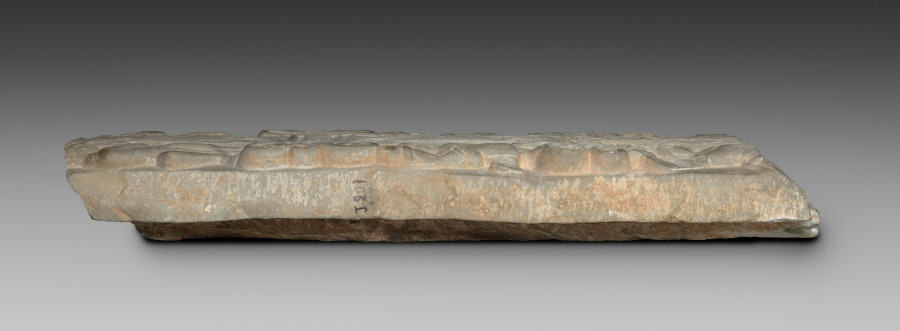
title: Veneration of the Buddha as a Fiery Pillar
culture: Southern India, Andhra Pradesh, Nagarjunakonda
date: 200s CE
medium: limestone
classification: Sculpture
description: At the bottom of this carved panel is the depiction of a pillar incised with cross-hatching and surrounded by a halo of flames. A stylized lotus and a pointed trident symbol marking good fortune and divinity crown the pillar. This image indicates the presence of the Buddha and underscores his superhuman qualities, including radiance and power to work magic. Two male figures hold fly whisks of honor on either side. Above is a golden pillar covered with jewels that the Buddha miraculously generated. Swirling leaves sprout from grooved disks at regular intervals, and celestial beings fly and dance in praise.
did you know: The acanthus leaves sprouting from the pillar echo Greco-Roman motifs.